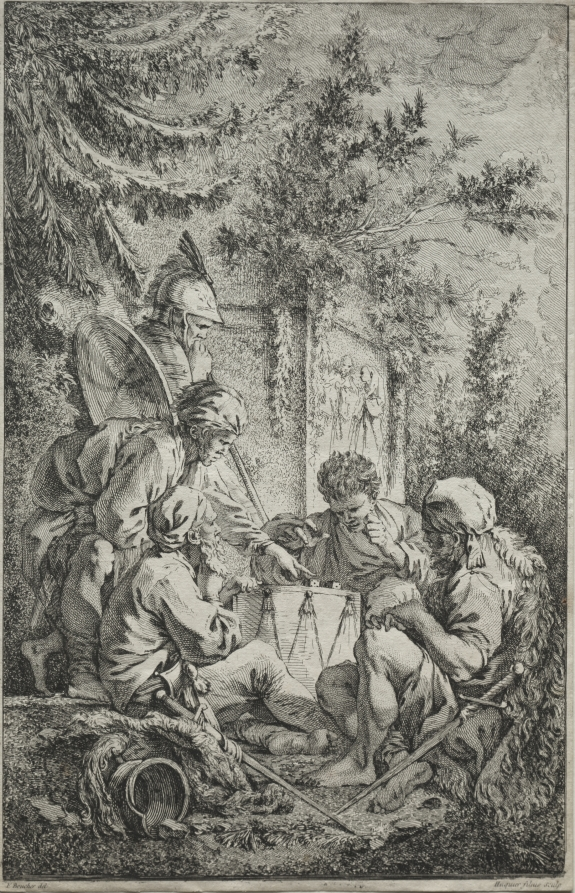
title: The First Guard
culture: France, 18th century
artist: Gabriel Huquier (French, 1695–1772)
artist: after François Boucher (French, 1703–1770)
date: c. 1754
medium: etching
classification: Print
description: Many of François Boucher's decorative designs were published as prints sometimes executed by the painter, etcher, and publisher-dealer Gabriel Huquier. Thus, both these artists played significant roles in the development and spread of the elaborate Rococo style. The First Guard-depicting a rustic band of young and old men who have temporarily shed their weapons to concentrate on a game of dice-typifies the sort of picturesque genre scene at which Boucher excelled. The artist displays his ingenuity by composing a pleasing arrangement of artfully posed figures and carefully placed objects.